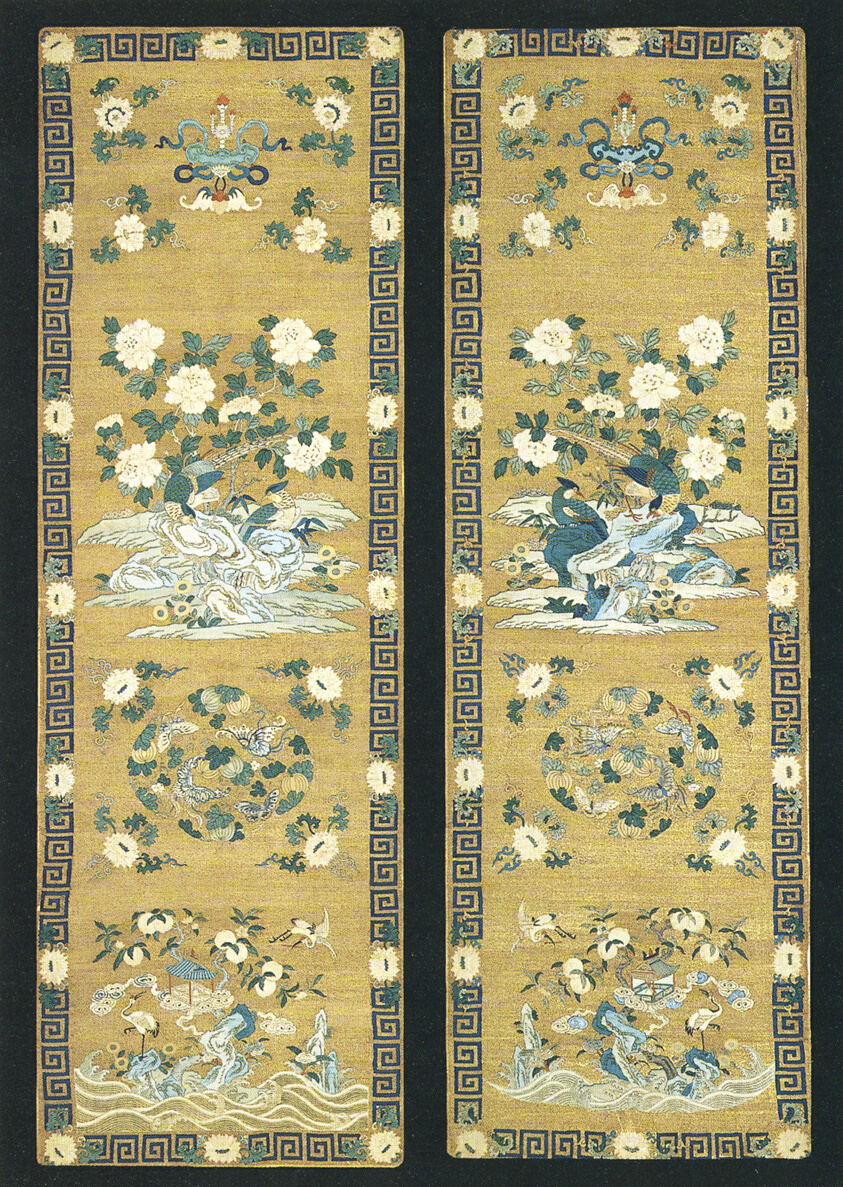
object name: Textile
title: Pair of Chair Panels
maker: China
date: Qing dynasty (1644–1911), late 17th/early 18th century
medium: Silk and gold-leaf-over-lacquered-paper-strip-wrapped silk, slit and single dovetailed tapestry weave; painted details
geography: China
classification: textile; weaving